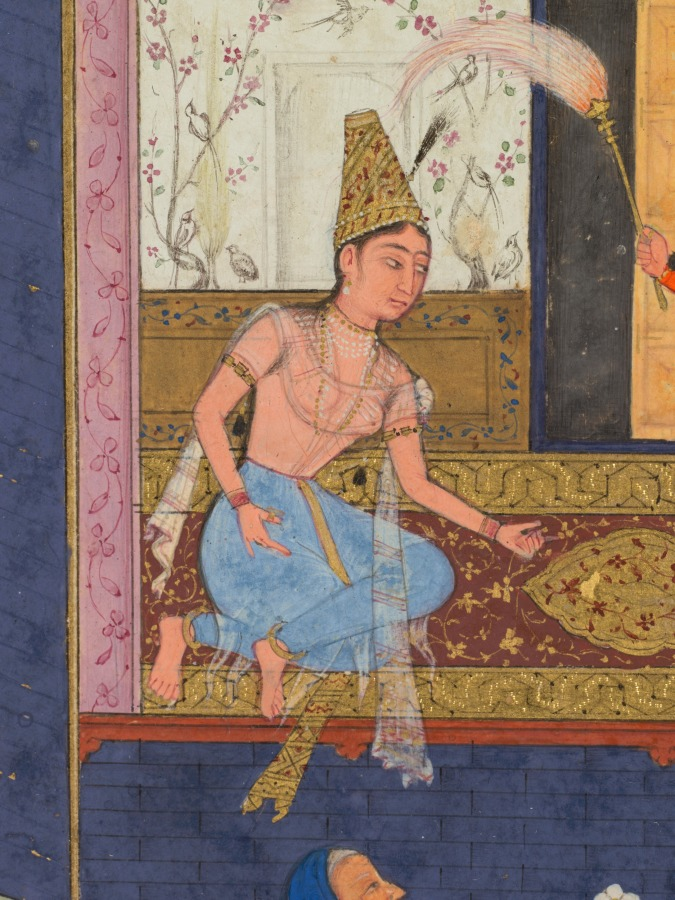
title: Zulaykha in her palace and as an elderly woman with Joseph (recto), from a Panj Ganj (Five Treasures) of Abd al- Rahman Jami (Persian, 1414–1492)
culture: Western Afghanistan, Herat (text); Mughal India (paintings)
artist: Mushfiq (Indian, active early 1600s)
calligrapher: Sultan 'Ali al-Mashadi (Iranian, 1430–1520)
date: 1603–7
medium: Gum tempera, ink, and gold on paper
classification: Painting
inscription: [[Upper left of painting, against a red background, in nasta’liq script]] ' amal - i Mushfiq sana 1015 Text on verso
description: The golden pot of white narcissus flowers at the bottom center of the painting signals that Zulaykha, leaning on her staff to the left, will imminently have her youth and beauty restored. In this Persian retelling of the Old Testament account from the Bible, Zulaykha lusted after Joseph, even though she was already married to Potiphar. Joseph, with the golden halo, resisted her advances until she became a widow and retained his youth, because of his extreme virtue. Above, Zulaykha as a young woman waits for Joseph in her house where murals of them as a happy couple are painted on the walls.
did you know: Zulaykha is shown four times: twice in the murals, seated in the center, and below when she is much older.